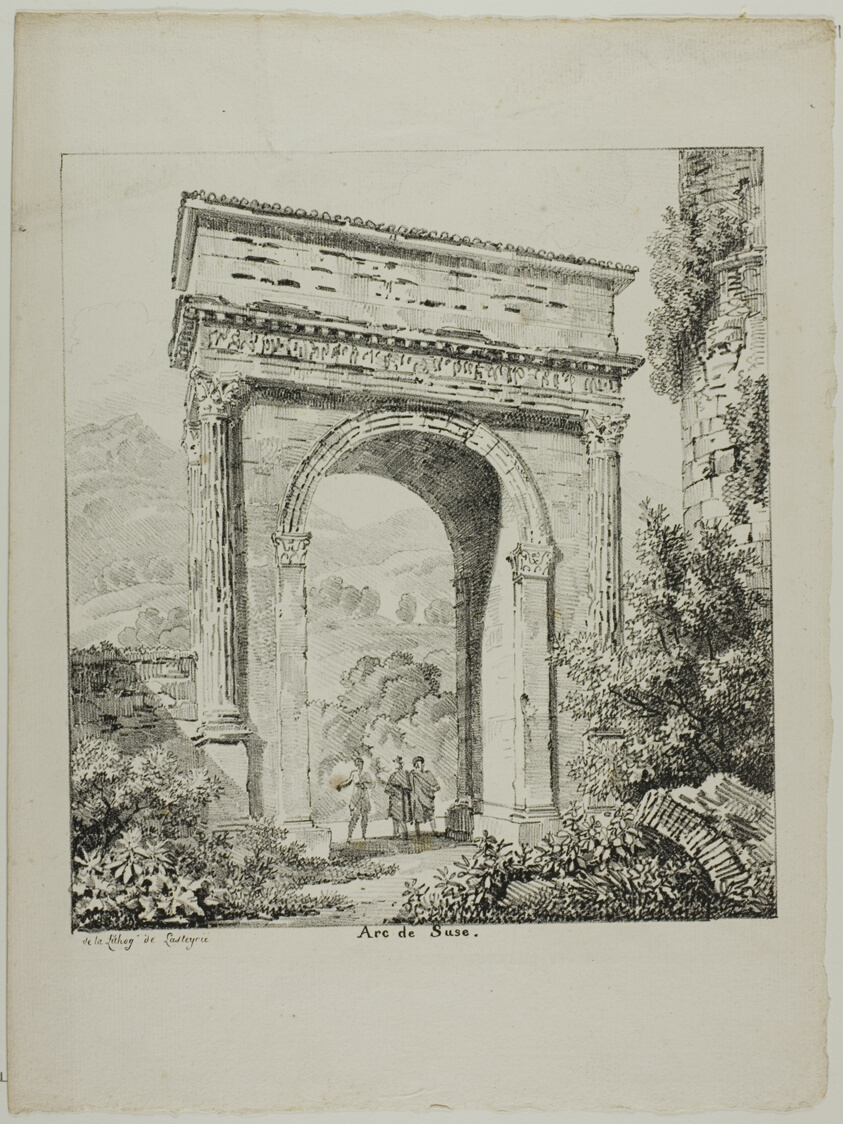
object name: Print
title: Susa Arch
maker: Louis Pierre Baltard (French, 1764-1846); printed by Comte de Charles Philibert Lasteyrie du Saillant (French, 1759-1849)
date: 1817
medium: Lithograph in black on ivory laid paper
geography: France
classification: lithograph; print; prints and drawing